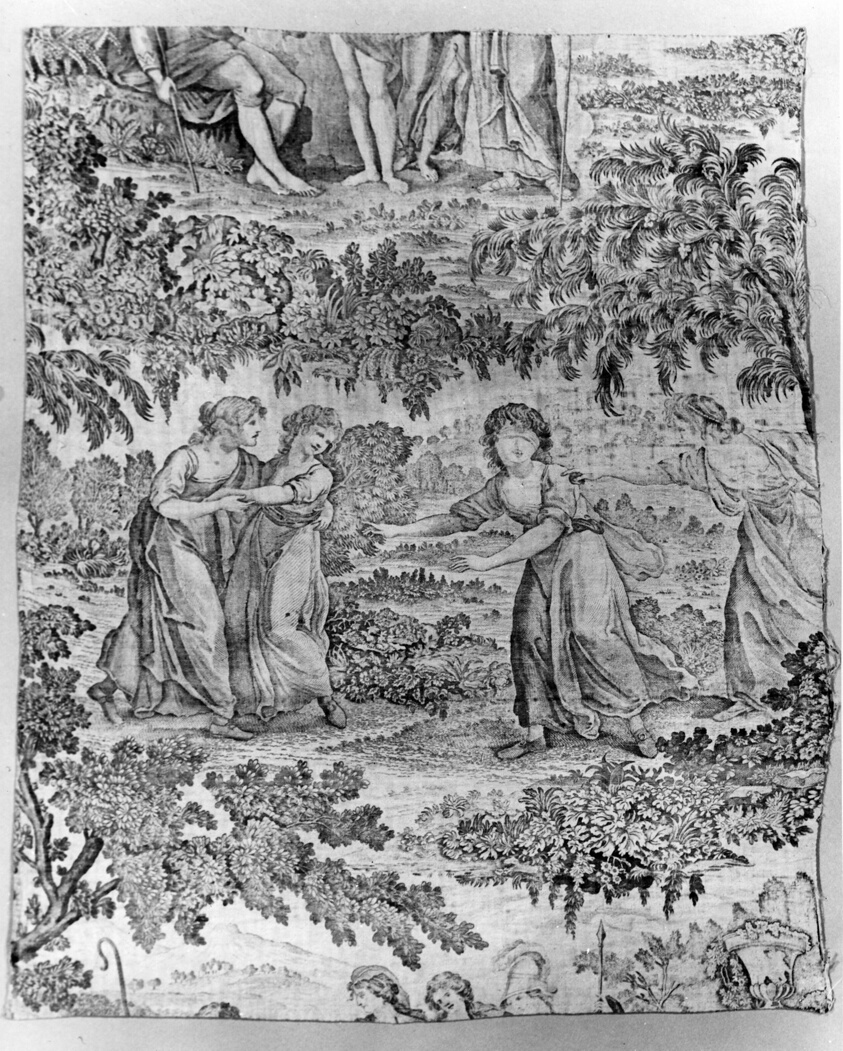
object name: Textile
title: Judgement of Paris and Blindman's Bluff (Furnishing Fabric)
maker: England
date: 1785/95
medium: Cotton, plain weave; copperplate printed; quilted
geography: England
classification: textile; weaving - printed; furnishing textile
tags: propaganda